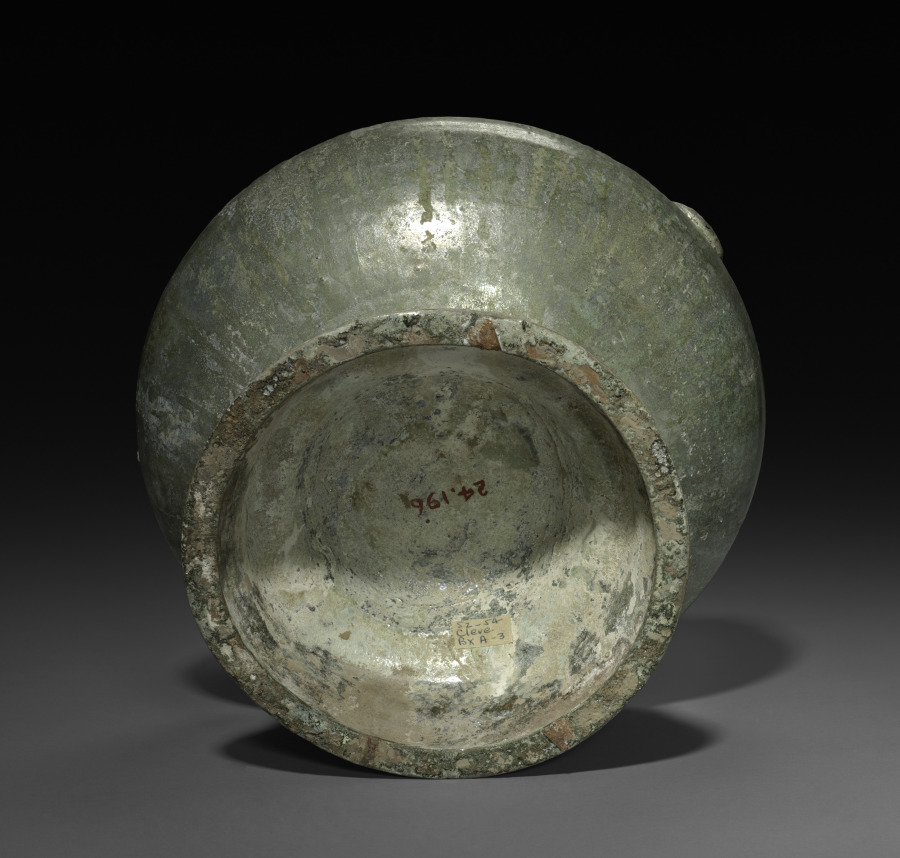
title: Covered Jar (Hu)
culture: China, Eastern Han dynasty (25–220 CE)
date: 25–220 CE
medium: earthenware with lead glaze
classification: Ceramic